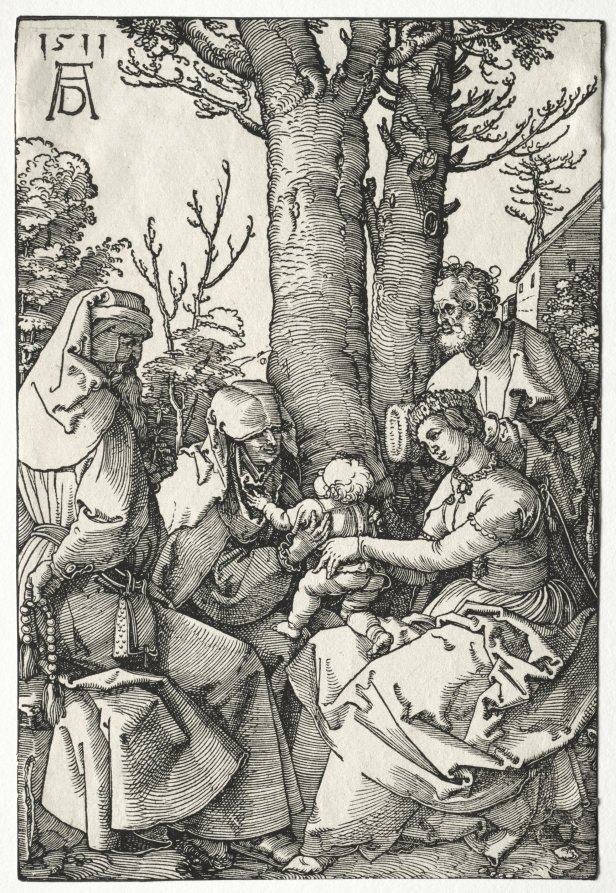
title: The Holy Family with Joachim and Anna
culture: Germany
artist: Albrecht Dürer (German, 1471–1528)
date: 1511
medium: woodcut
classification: Print